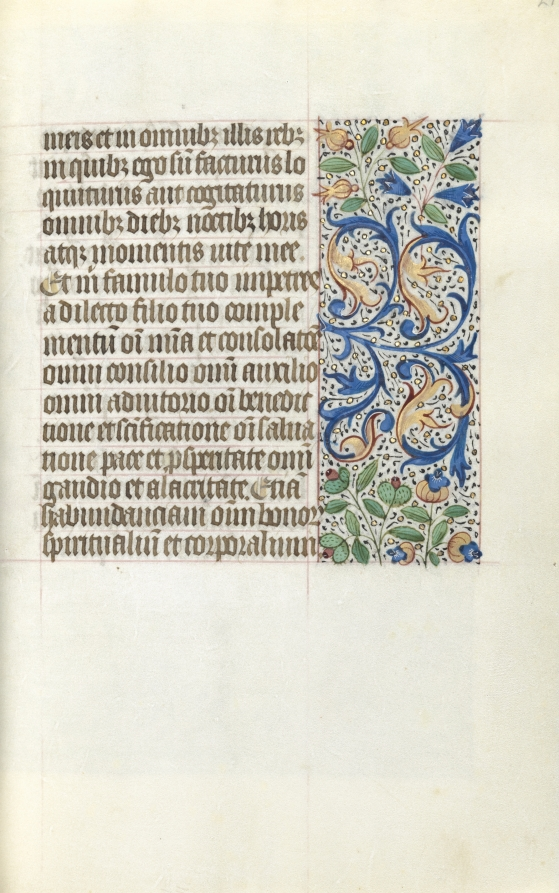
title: Book of Hours (Use of Rouen): fol. 21r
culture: France, Rouen, 15th century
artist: Master of the Geneva Latini (French, active Rouen, 1460–80)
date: c. 1470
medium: ink, tempera, and gold on vellum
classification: Bound Volume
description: In the late 1400s and early 1500s Rouen was an established and important center of book production. The city’s cathedral had a wealthy chapter that spent large sums of money to commission books and to maintain its extensive library. The stationers and booksellers would have likely been concentrated in or near the cathedral precinct. This artist, named after a manuscript now in Geneva, was Rouen’s principal illuminator during the second half of the 1400s.